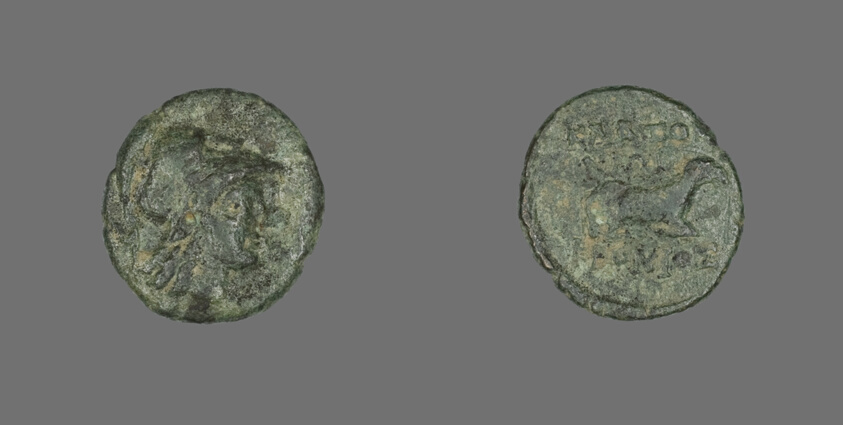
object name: Coin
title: Coin Depicting the Goddess Athena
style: greek, ancient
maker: Greek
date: 387-301 BCE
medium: Bronze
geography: Ancient Greece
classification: coin; ancient art